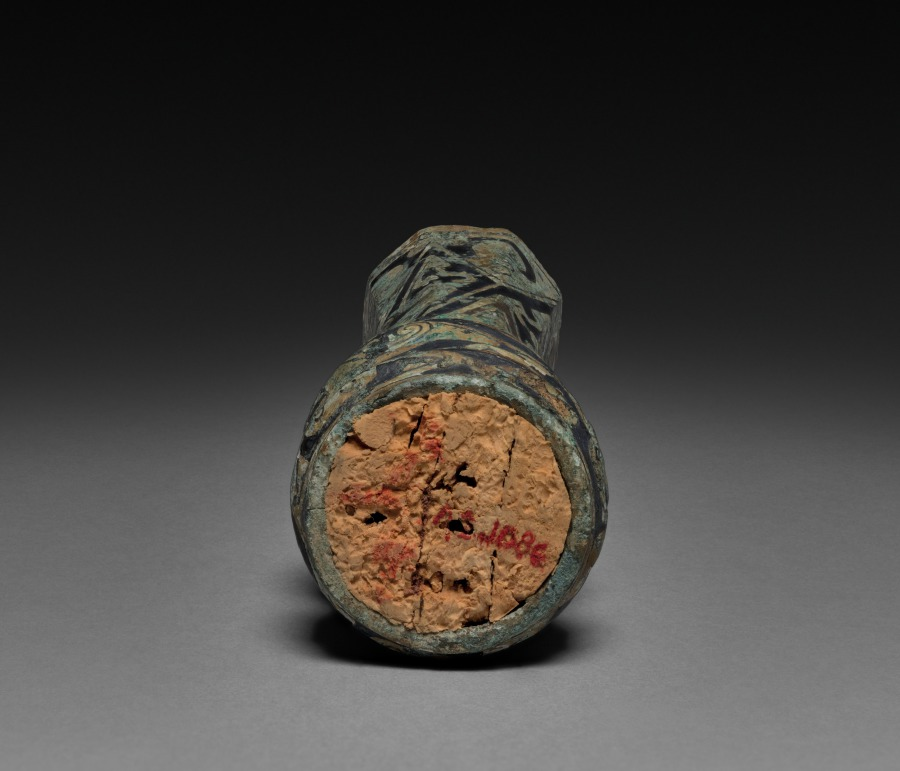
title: Shaft Mounting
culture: China, Eastern Zhou dynasty (770–256 BCE), Warring States period (475–221 BCE)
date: 500–300 BCE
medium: bronze inlaid with gold and silver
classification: Metalwork